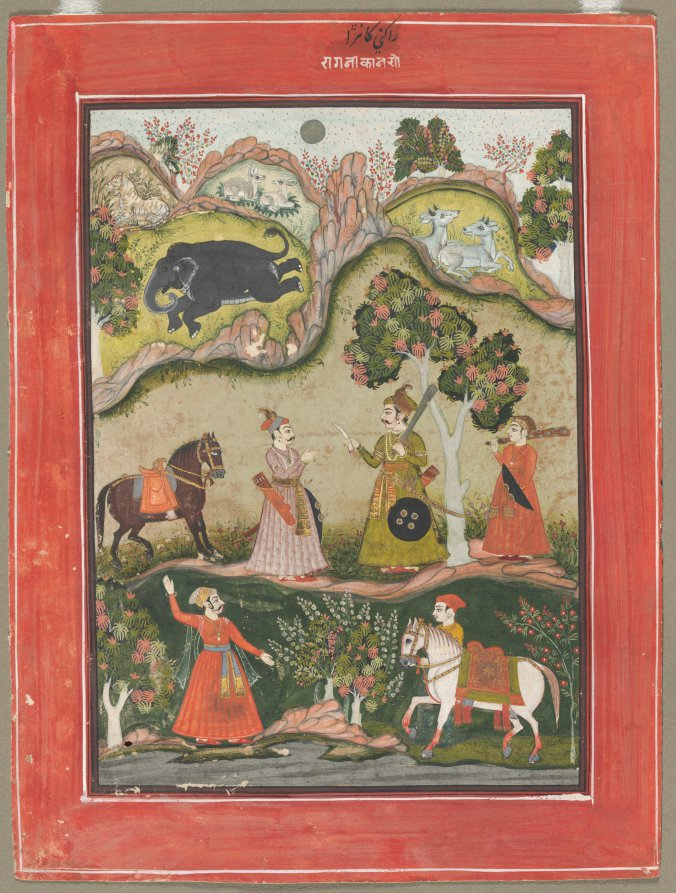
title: Kanhara Ragini: Song of Inspiration to Krishna for Killing the Elephant Demon, from the Ragamala Series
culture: India, Rajasthan, Bundi-Kota school, 18th century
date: c. 1760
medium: color on paper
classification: Painting